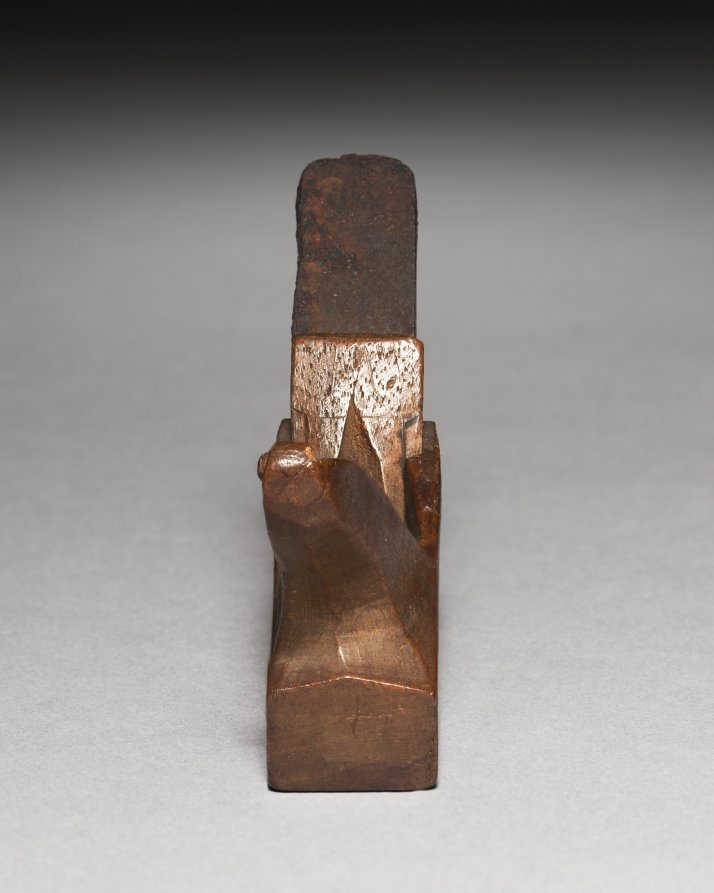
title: Plane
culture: Europe, 18th century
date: 1700s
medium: wood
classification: Tool